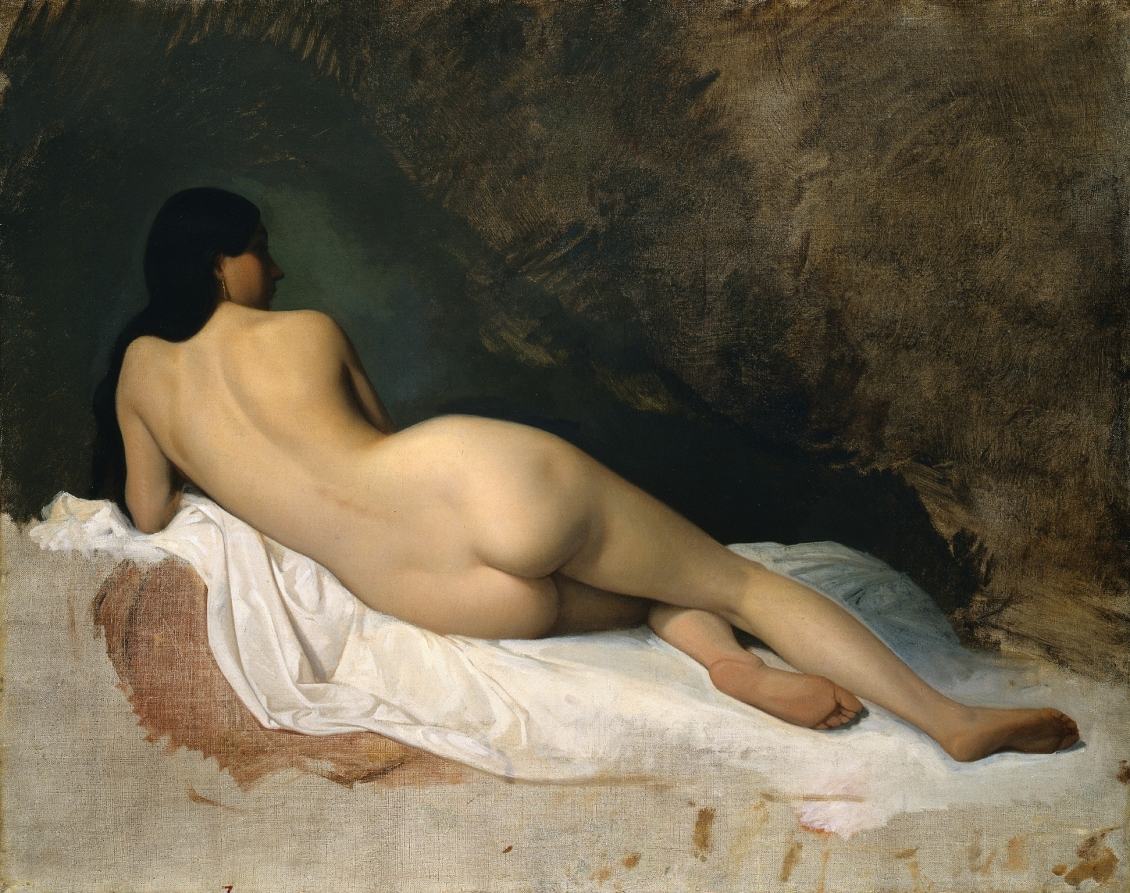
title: Study of a Reclining Nude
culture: France, 19th century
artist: Isidore Pils (French, 1813/15–1875)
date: c. 1841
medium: oil on fabric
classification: Painting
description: The languorous, sensuous pose of this woman is strongly reminiscent of Jean Auguste Dominique Ingres's popular paintings of odalisques, female slaves, and concubines in Turkish harems. Much of this canvas has been left thinly painted or entirely blank, suggesting that it was a figural study rather than a finished work of art. The French Academy in the 1800s viewed the depiction of the nude as the ultimate measure of an artist's skill. Because models changed poses frequently, students had to work quickly and without embellishment. Here the artist completed only those areas needed to emphasize the contours of the model's body.